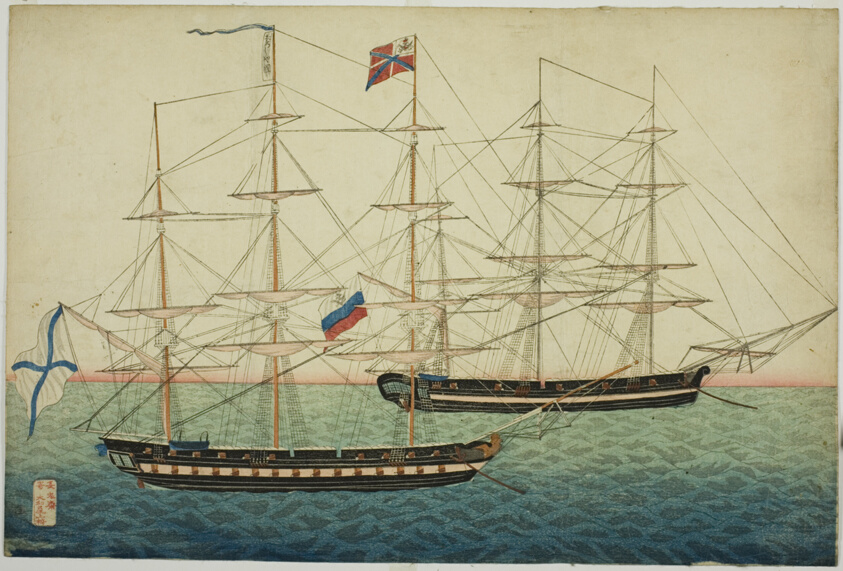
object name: Print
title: Russian Vessels, from the Album of seven prints of Russian Army and Warship (Roshia seigi shashin kan)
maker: Kawahara Keiga; Japanese, 1786-1860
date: 1853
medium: Color woodblock print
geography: Japan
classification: woodblock print; print; asian art